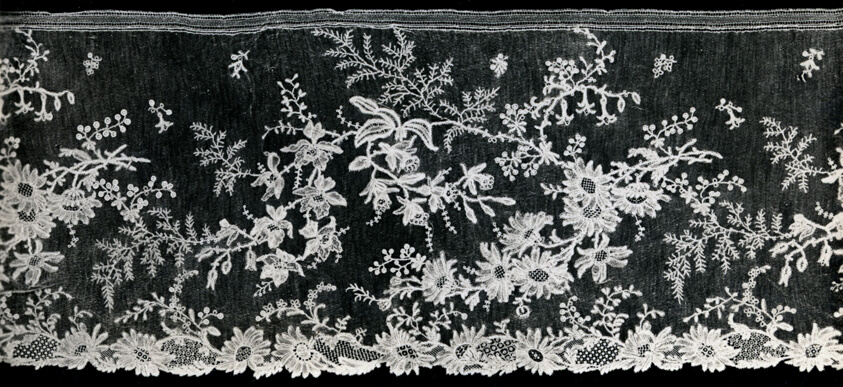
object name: Textile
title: Flounce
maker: Belgium, Brussels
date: 1860s/90s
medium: Cotton, mixed lace of a type known as "Application d'Angleterre;" bobbin lace motifs with needle-made fillings on a needle lace mesh ground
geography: Brussels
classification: textile; lace - mixed